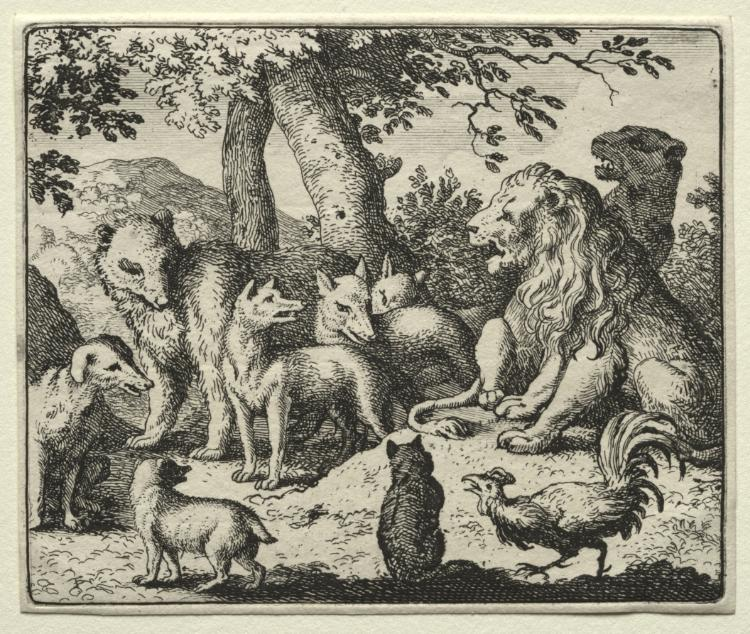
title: Reynard the Fox: Reynard Exonerates Himself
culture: Netherlands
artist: Allart van Everdingen (Dutch, 1621–1675)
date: 1650–75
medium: etching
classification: Print